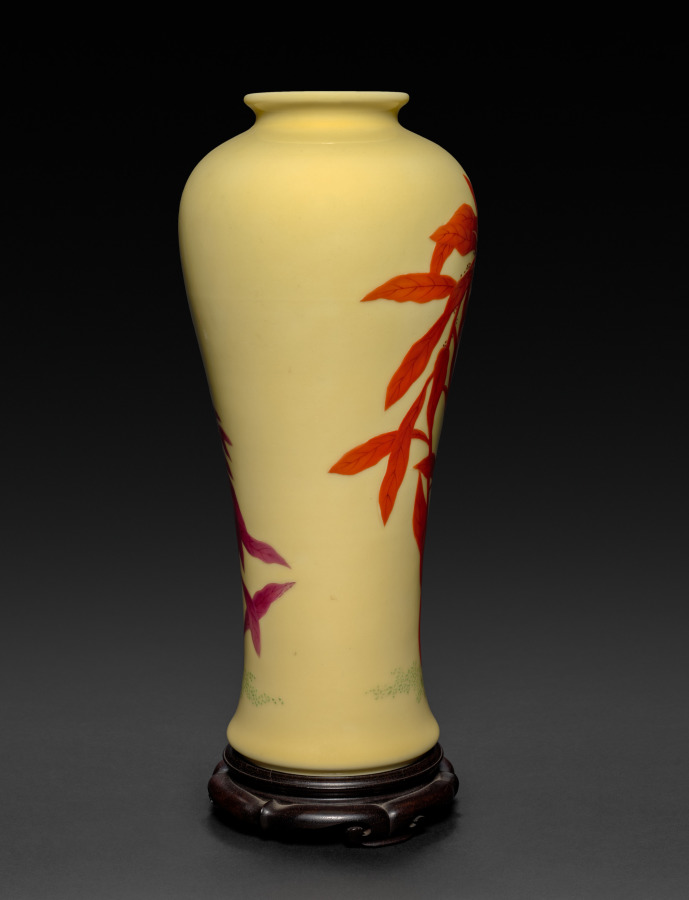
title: Prunus Vase with Amaranth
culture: Japan, Taishō period (1912–26)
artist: Seifū Yohei IV (Japanese, 1872–1951)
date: 1914–46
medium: Porcelain with yellow glaze and overglaze color enamel and gold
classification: Ceramic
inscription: 清風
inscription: 渡邊所藏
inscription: 清風造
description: Yohei IV’s interest in bold, colorful designs is on full display in this vase shaped like a “prunus vase,” or meiping (Japanese meipin). It has two colors of amaranthus on a yellow ground. It follows a design appearing on a sleeve-shaped vase by Yohei III. Yohei IV uses bright spring-green dots of overglaze enamel to suggest a ground plane in his yellow environment; he also uses red and magenta accented with wild gold cascades of dots for two plants he places on opposite sides of the vase, one much larger than the other. In Yohei III’s version, the body of the vessel is white, and the foliage of one plant is red with carefully painted veins in gold, while another plant strategically positioned behind it has a deep rust color, again carefully detailed in gold. In a sense, Yohei IV has deconstructed his father’s logical, balanced design and re-presented it as an emotive, lightheartedly chaotic one that sates the appetite for instant gratification, much as his father’s creation rewards the pursuit of elegance.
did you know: Seifū Yohei IV continued to create works in the studio’s signature colors but also produced pieces with strong color and flare that were his interpretations of Qing dynasty (1644–1911) glazes.